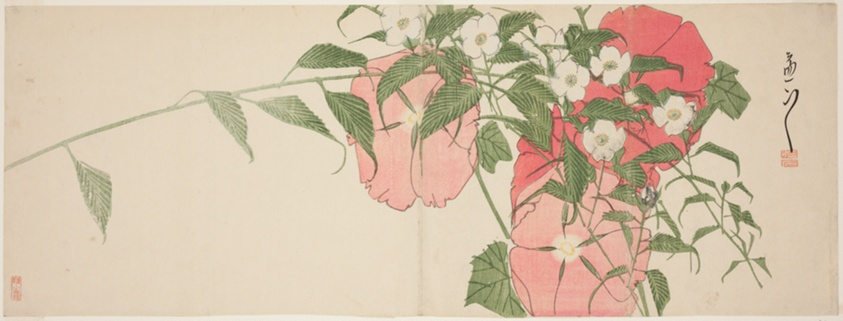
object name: Print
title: Flowers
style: Japanese (culture or style)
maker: Sato Suiseki; Japanese, 19th century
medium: Color woodblock print, surimono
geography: Japan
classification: print; asian art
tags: flora, green (color), red (color), pink (color), flowers